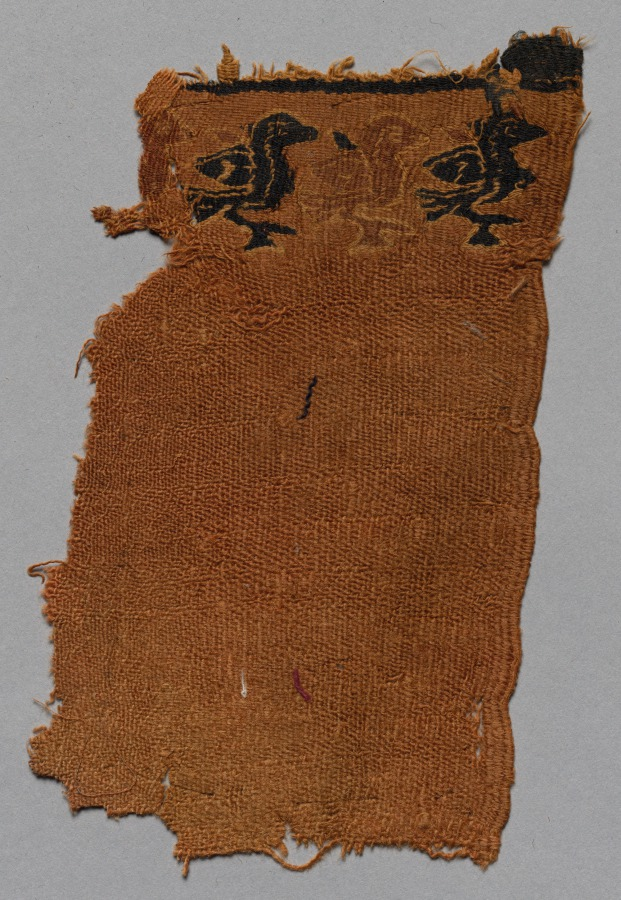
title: Fragment with Frieze of Birds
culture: Egypt, Byzantine period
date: 400s - 500s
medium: tabby ground, inwoven tapestry ornament; wool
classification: Textile